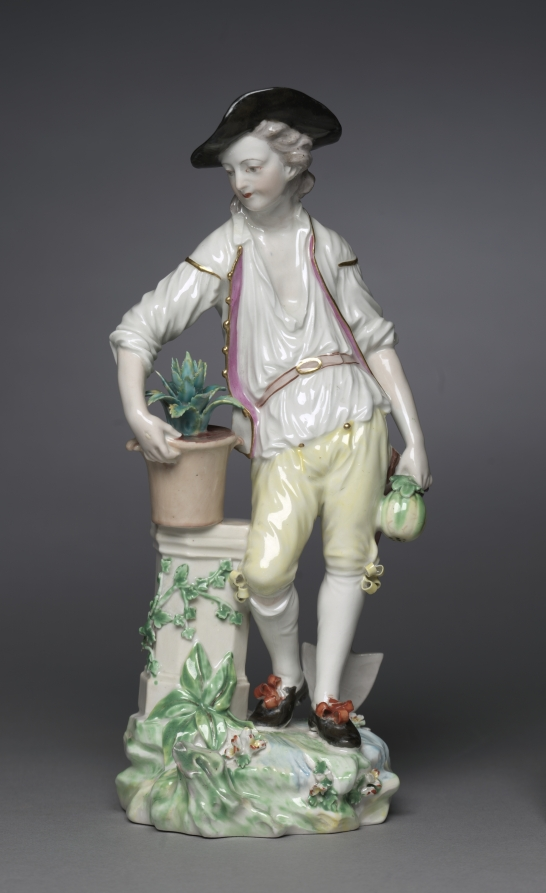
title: Earth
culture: England, Derby, 18th century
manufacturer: Derby Porcelain Factory (Chelsea-Derby Period, 1770–84)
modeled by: Pierre Stèphan (Swiss, active 1760–98)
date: c. 1775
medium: soft-paste porcelain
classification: Ceramic